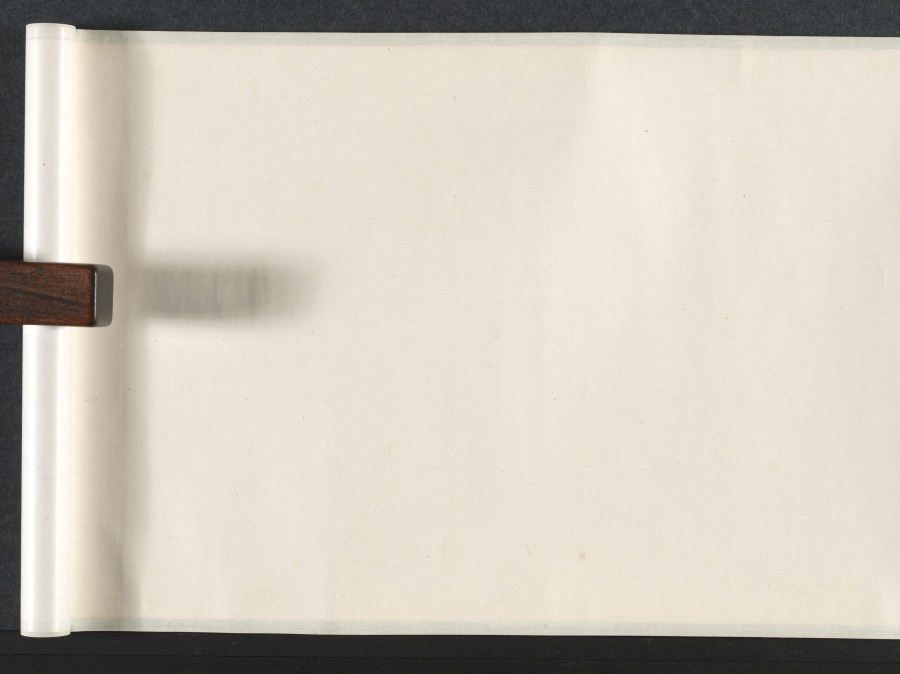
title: Nine Songs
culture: China, Yuan dynasty (1271-1368)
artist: Zhang Wo (Chinese, active c.1336–after 1364)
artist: Chu Huan (Chinese, active 1361)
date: 1361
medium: handscroll; ink on paper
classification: Painting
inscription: 7 colophons and 47 seals: 1 colophon, dated 1361, and 28 seals of Chu Huan 褚奐 (active c. 1361); 1 colophon, dated 1785, and 1 seal of Lu Shihua 陸時化 (1714-1779); 2 seals of Lu Yü-ch'ing (18th c.); 1 colophon, dated 1935, of Ye Gongchuo 葉恭綽 (1881-1968); 1 colophon, dated 1935, of Wu Hufan 吳湖帆(1894–1968); 1 colophon, dated 1938, and 1 seal of Wang Tongyu 王同愈 (1856-1941); 1 colophon, dated 1941, of Wu Huayuan 吳華源 (1893-1972); 1 colophon, dated 1942, and 9 seals of Xu Bangda 徐邦達 (1911–2012); 1 colophon, dated 1942, of Lang Jingshan 郎靜山 (1892-1995); 1 colophon, dated 1944, of Tang Yun 唐雲 (1910-1993); 6 seals of Wang Jiqian [C.C. Wang] 王季遷 (1907–2003).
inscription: Text of The Nine Songs written by Chu Huan at the end of each section.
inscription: 右離騷九歌圖，宋龍溟居士李公本，淮南張渥叔厚所畫妙絕當世。家藏請予書其辭目識于左。至正二十一年辛醜三月旦河南褚奐記。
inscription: Colophon by Lu Shihua 陸時化 (1714–1789): This scroll is fortunate to have been handed down from collections of the right people. Now, after 500 years, its condition is as good as when it was painted. I acquired this from Mr. Shen Guiyu [1673-1769], the President of the Board of Rites. The label is in his handwriting when he was 95 years old. I submit that Chu Huan (t. Shiwen) of the Yuan Dynasty was a native of Qiantang. His "seal" and li writings are in the style of Wu Rui. For example, in [Chu Kuei's] Ming ji lu [A list of masterpieces] is recorded the stele commemorating the restoration of the prefectural school of Kun-shan, the text of which was composed by Yang Weizhen in the twenty-first year of Zhizheng [1361]; and the calligraphy as well as the title in li style was by Chu Huan, who was at that time an assistant judge of the prefecture of Haining in the circuit of Hangzhou. Zhang Wo's zi is Shuhou (叔厚). His literary name is Zhen Qisheng (贞期生). According to [Gu Ying's] Yu shan cao tang ya jii, he liked to paint in the bai-miao or the "pure delineation" style after the method of Li Longmian [Li Gonglin 李公麟], which finds no peer among the ancient masters. This is agreed upon [by Pei Ch'iung] in his Qing jiang zhi who praised [Zhang Wo] as being quite learned and well-versed in many branches of the arts, especially figure painting. Recorded by Lu Shihua [The mountain dweller], listening to the pine, in the twelfth month of the yisi year [1785].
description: Painted in the baimiao, or fine-line drawing style, this ancient work demonstrates the literati’s use of abstract calligraphic brushwork for self-expression. The subject of the “Nine Songs”—songs associated with shamanistic rituals in the ancient Chu kingdom—had traditionally provided artists with myths and legends that they could explore and reinterpret in their own works.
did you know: Divided into eleven sections, the scroll contains illustrations by painter Zhang Wu followed by a transcription of the relevant verse by calligrapher Chu Huan.